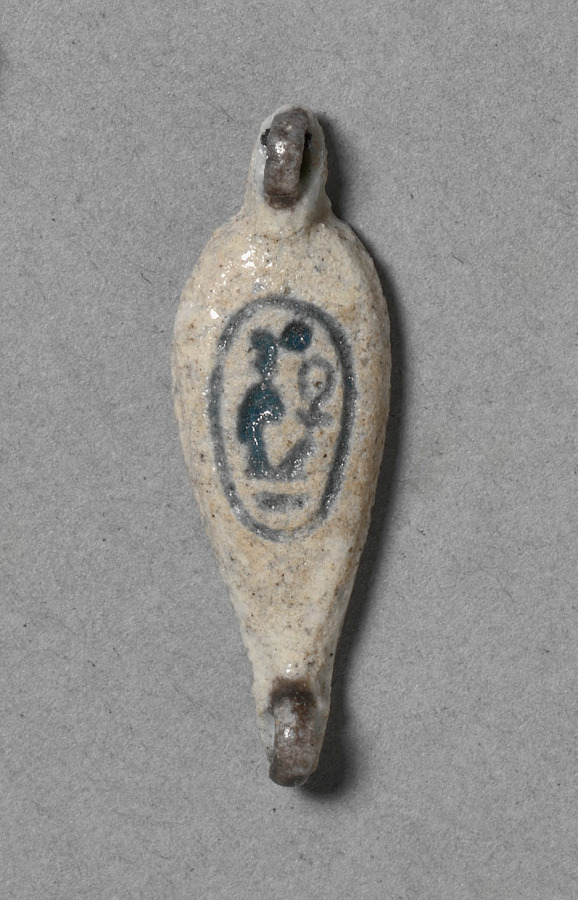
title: Petal-Shaped Bead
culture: Egypt, New Kingdom (1540–1069 BCE), Dynasty 18, reign of Amenhotep III (1390–1352 BCE)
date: c. 1391–1353 BCE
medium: faience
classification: Jewelry